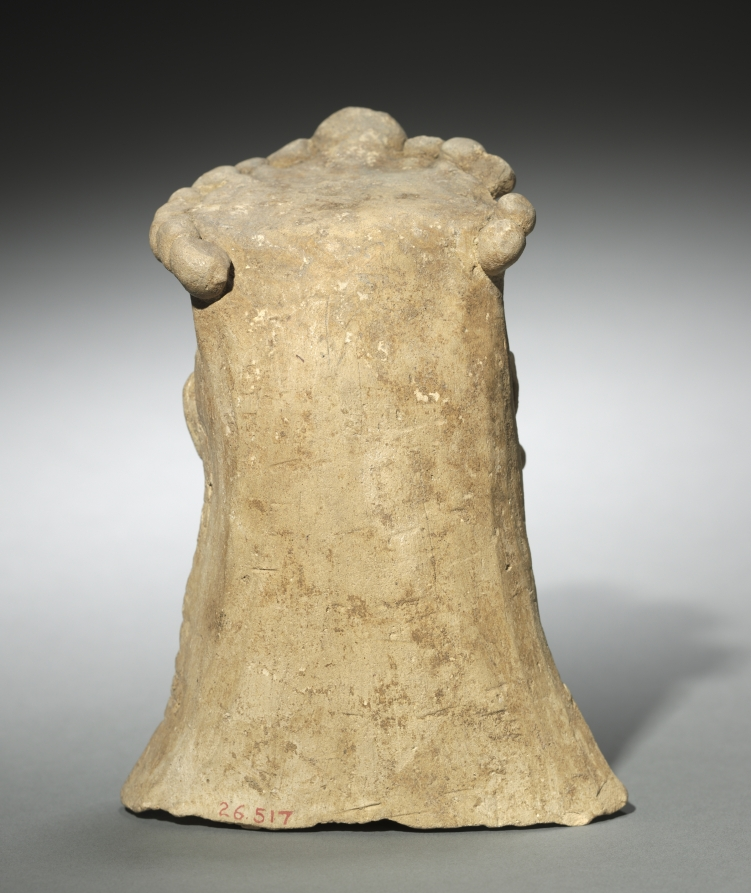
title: Woman's Head with Crown and Earrings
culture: Greece, Sicily(?)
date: 600–475 BCE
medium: terracotta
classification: Sculpture